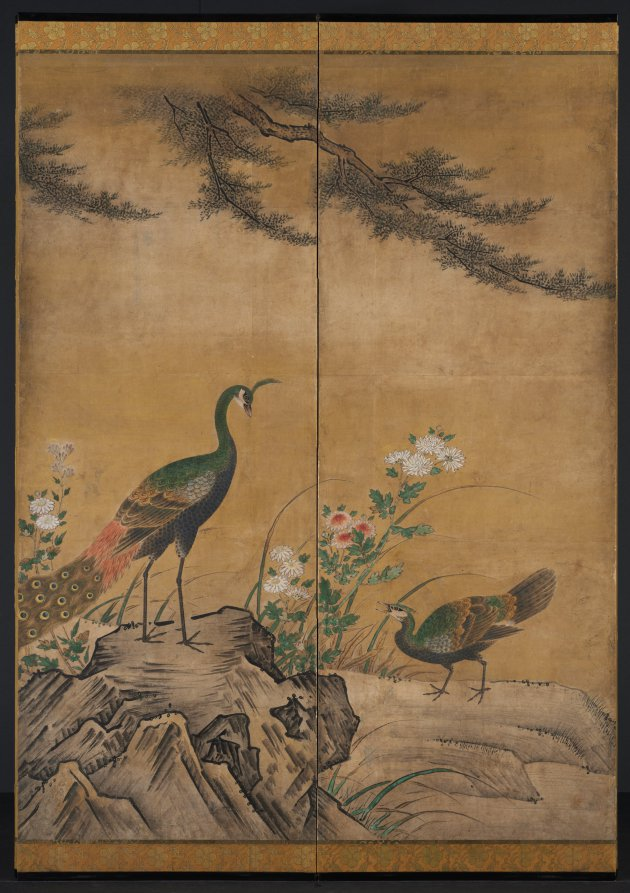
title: Birds and Flowers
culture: Japan, Momoyama period (1573–1615)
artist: attributed to Kano Mitsunobu (Japanese, 1565–1608)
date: late 1500s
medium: One of a pair of six-panel folding screens; ink, color, and gold on paper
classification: Painting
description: The landscape depicted in this pair of screens follows a seasonal progression from right to left, starting with the blossoming plum of early spring and ending with late autumn peonies. A variety of smaller birds are positioned throughout the scene, and a trio of swimming ducks is bracketed by early summer irises and early autumn bellflowers at the center. While some raptors (birds of prey) terrorize a pheasant and an egret (a waterfowl) to the right, a peacock and peahen converse to the left. Hawks are associated with military prowess, while the peafowl suggest cultural prestige.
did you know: As masters of the Kano academic painting style, both Kano Shōei and Kano Mitsunobu favored Chinese-inspired subject matter, such as birds and flowers.